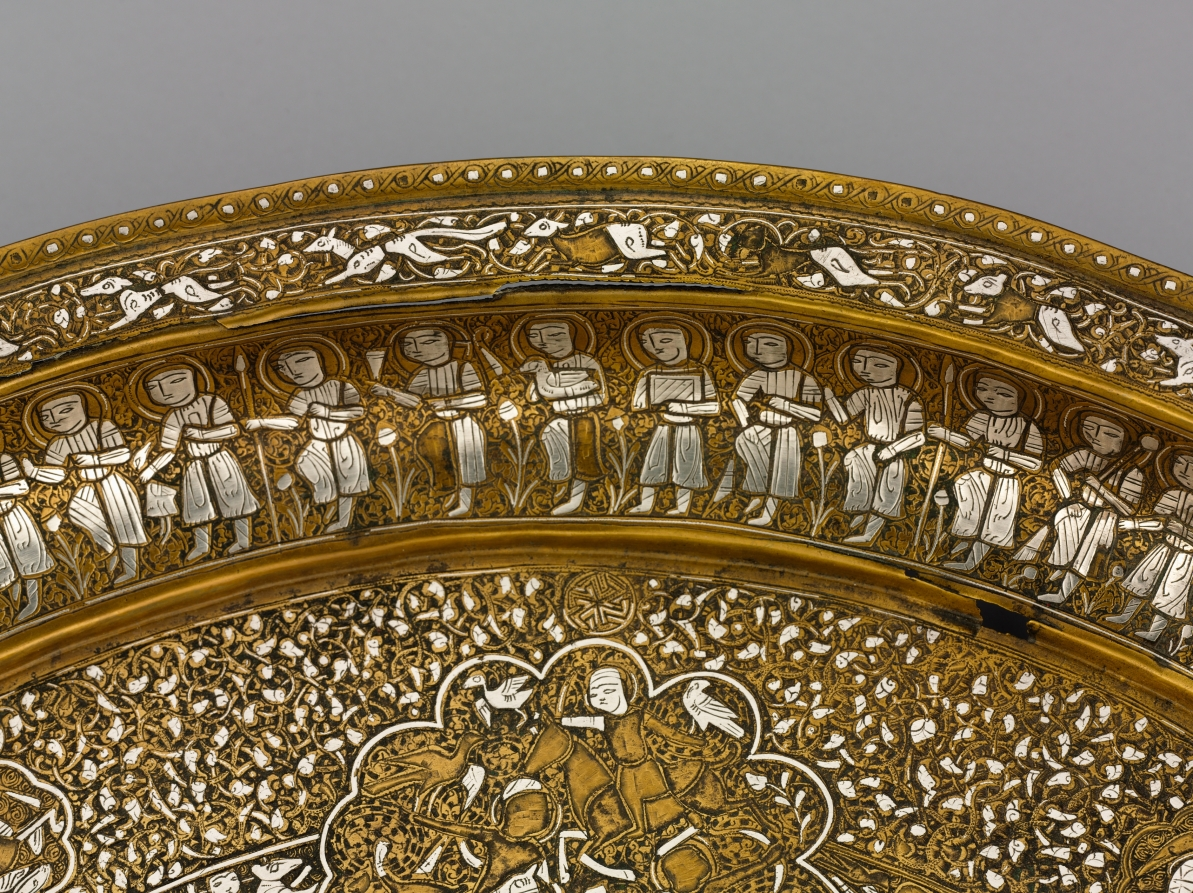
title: Tray Portraying Courtly Pleasures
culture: Syria, Ayyubid period (1171–1260)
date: 1240s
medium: sheet brass inlaid with silver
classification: Metalwork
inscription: The presence of ligatures in the narrow circular bands with interconnected human and animal figures suggests this may be a degenerate form of animated script. It is indecipherable.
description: This tray features images of courtly life interspersed with astronomical symbols. The scenes contained within large multilobed medallions display an enthroned prince with lions at his feet, a banquet, a hunt, dancers, and musicians. Contained within the concentric circles there are also references to solar and lunar motifs, including figures holding sunbursts and lunar crescents. This tray is made of a single sheet of brass and the silver inlay, which is best preserved on the tray’s inner curve, suggests its original brilliance.